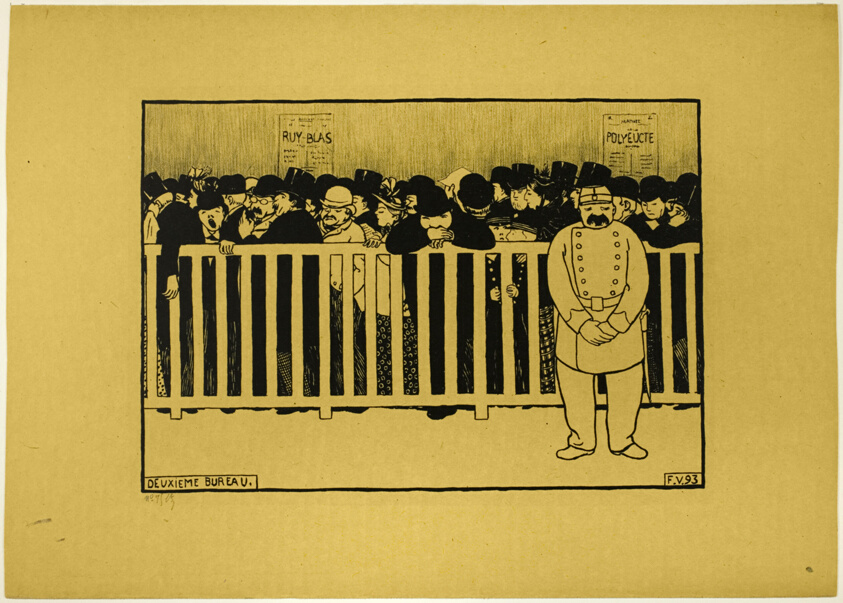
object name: Print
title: Box Office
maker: Félix Edouard Vallotton (French, born Switzerland, 1865-1925)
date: 1893, published 1894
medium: Zincograph in black on dark yellow wove paper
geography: France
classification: zincograph; lithograph; print; prints and drawing